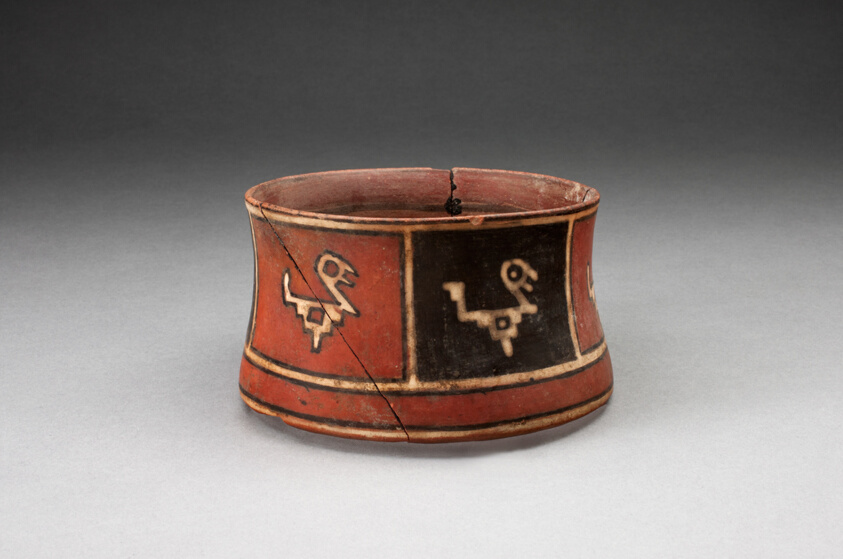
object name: Vessel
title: Miniature Straight-sided Bowl with Abstract Bird Motifs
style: inca, south american, andes, Arts of the Americas, andean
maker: Ica (South coast or southern highlands, Peru)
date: 1450–1532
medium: Ceramic and pigment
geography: Southern Peru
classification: bowl; earthenware; ceramics; vessel; art of the americas